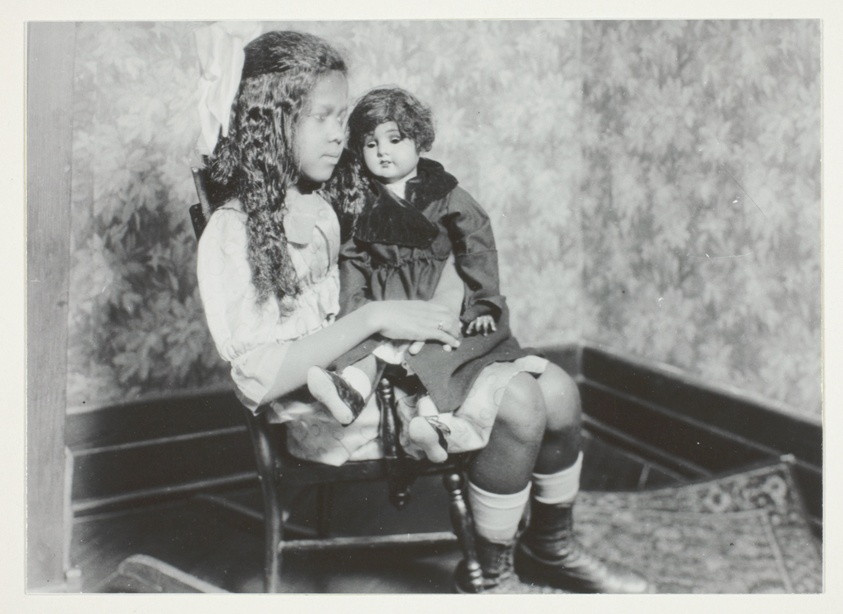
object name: Photograph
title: Untitled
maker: Lewis Wickes Hine (American, 1874–1940)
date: c. 1910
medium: Gelatin silver print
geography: United States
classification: gelatin silver (developing-out-paper) pr; photographic process; photography; photograph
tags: Collected by Hugh Edwards